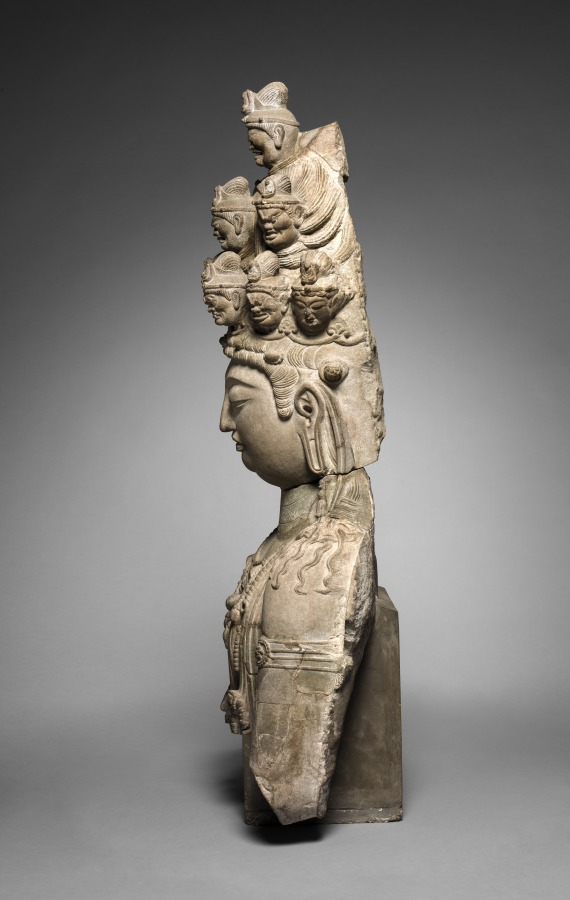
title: Eleven-Headed Guanyin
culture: China, Tang dynasty (618-907)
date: early 700s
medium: gray sandstone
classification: Sculpture